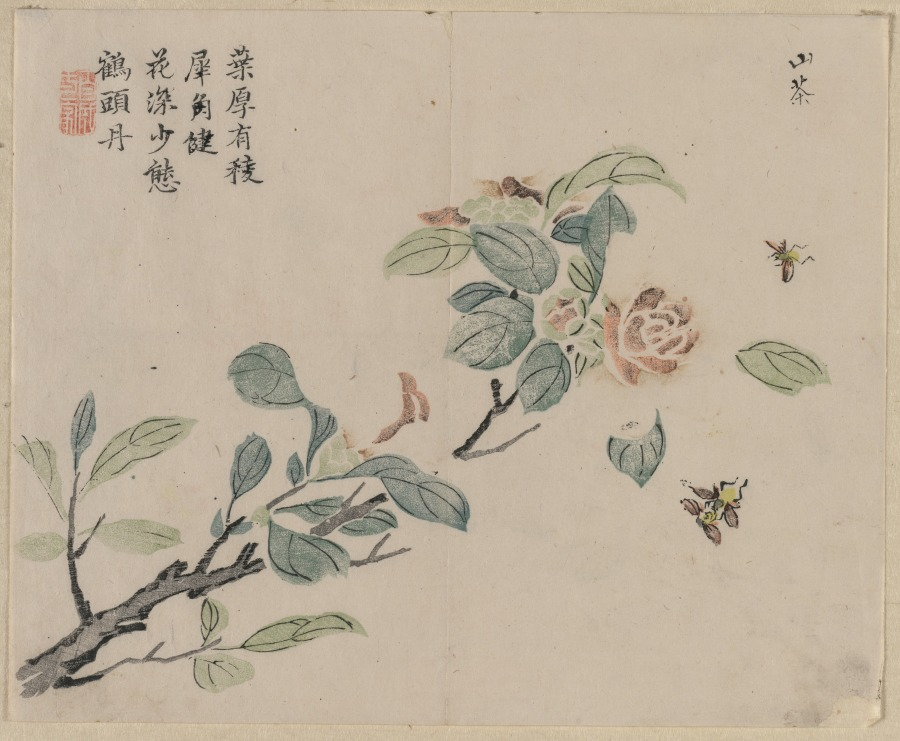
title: Flowering Branch with Bees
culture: China, Qing dynasty (1644-1911)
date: 18th Century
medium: color woodblock print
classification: Print